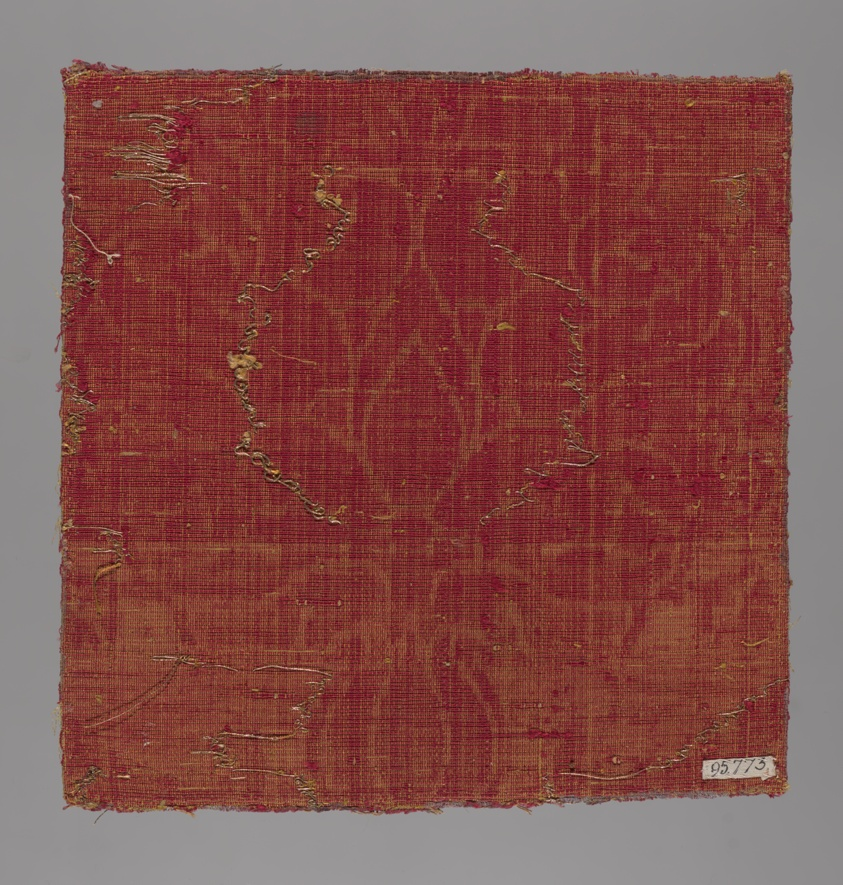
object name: Textile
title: Fragment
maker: Italy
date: 1450/1500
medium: Silk, warp-float faced 3:1 twill weave with weft-float faced 1:3 twill interlacings of secondary binding warps and gilt-metal-strip-wrapped silk supplementary facing wefts and supplementary brocading wefts forming weft loops in areas and with supplementary pile warps forming pile-on-pile cut voided velvet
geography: Italy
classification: textile; weaving - velvet; weaving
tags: pomegranates